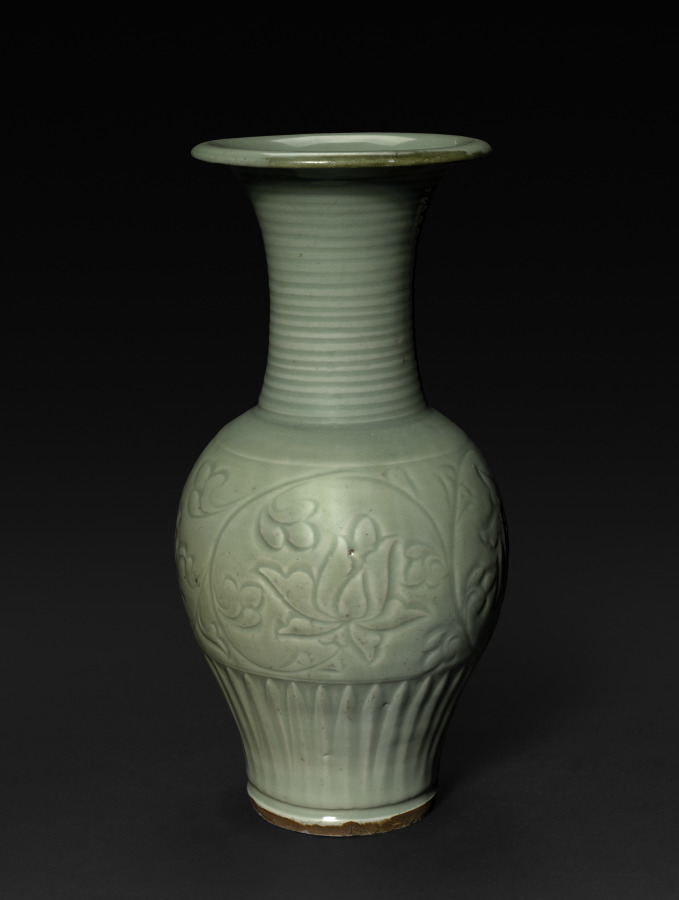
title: Vase: Celadon Ware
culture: China, Ming dynasty (1368–1644)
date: 1368–1644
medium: stoneware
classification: Ceramic